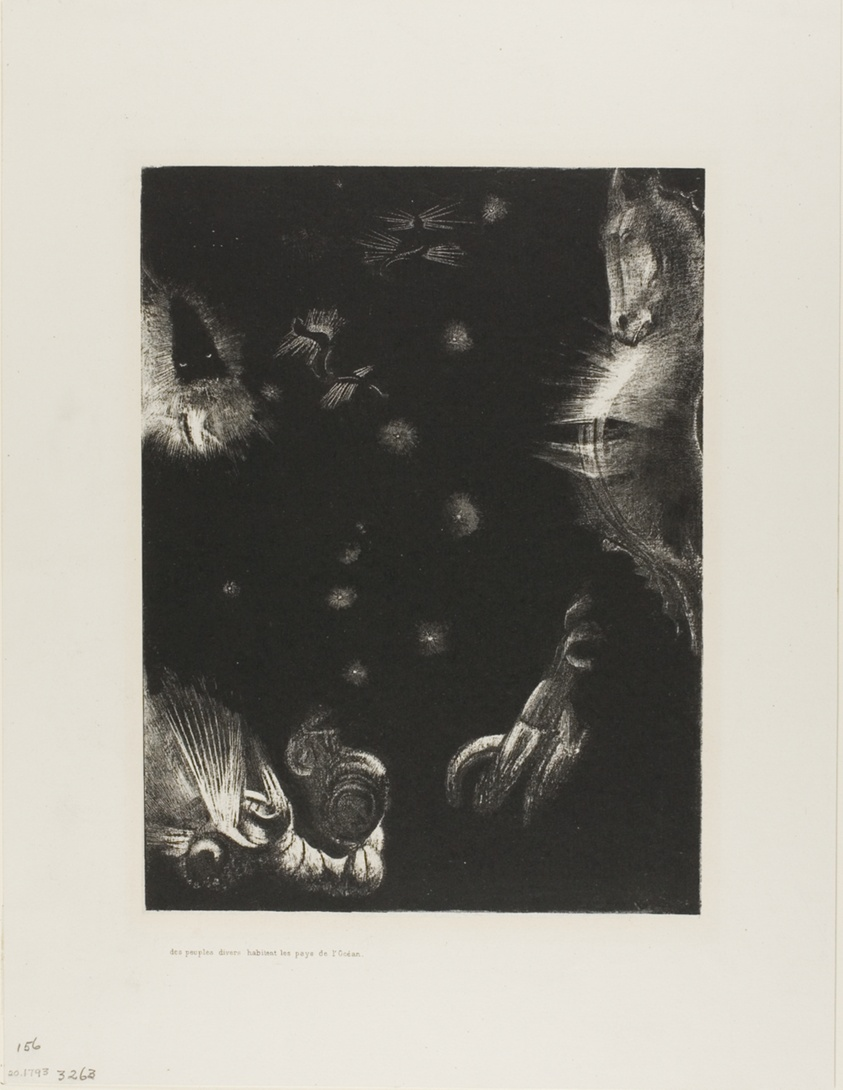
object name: Print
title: Different Peoples Inhabit the Countries of the Ocean, plate 23 of 24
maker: Odilon Redon (French, 1840-1916)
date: 1896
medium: Lithograph in black on ivory China paper laid down on ivory wove paper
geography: France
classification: lithograph; print; prints and drawing; paper